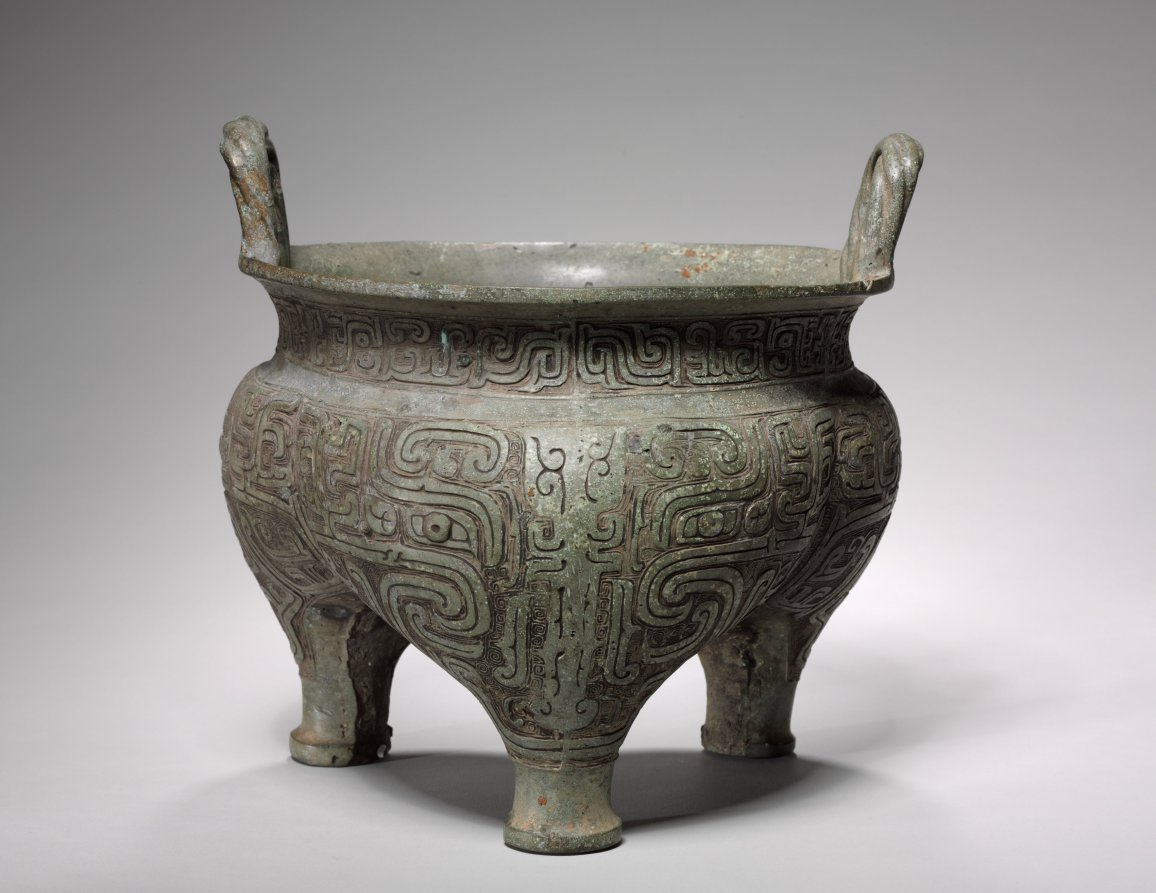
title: Hollow-Legged Tripod (Li Ding)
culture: China, Shaanxi province, Xi'an, Western Zhou dynasty (c. 1046–771 BCE)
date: late 900 BCE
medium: bronze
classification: Metalwork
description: This food vessel exhibits a new decorative trend of metropolitan Western Zhou foundries. Zoomorphic images became increasingly abstract and subject to linear elaboration. The dominating animal mask (taotie) of the Shang is here transformed, dissolved, and dissected into intricate patterns of curving bands and median grooves. The design is abstract but not devoid of symbolic contents and functions. A smooth and even gray-green patina--the result of natural corrosion during burial--covers the outside and creates a new visual impact on the surface decoration.